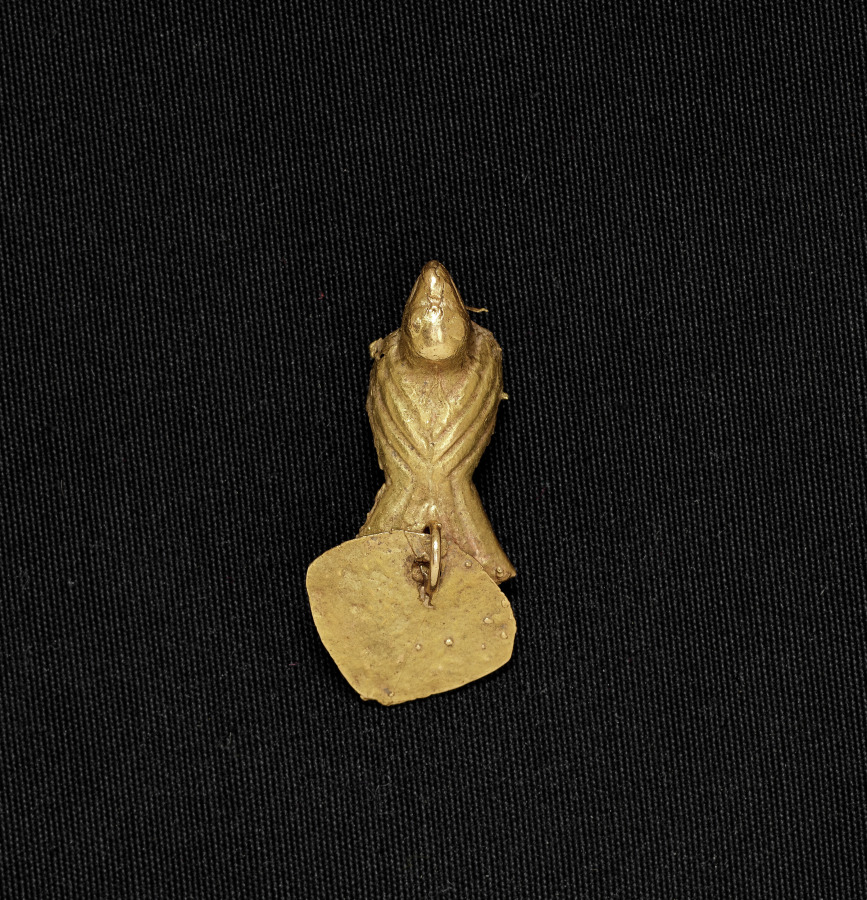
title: Bird Bead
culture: Colombia, Muisca style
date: c. 900–1550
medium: cast gold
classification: Jewelry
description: Muisca metalwork divides into two categories: ornaments to be worn, such as these, and offering figurines, in the case to the right. The elaborate bird pendant features delicate herringbone moldings, openwork patterns, and wing details-all part of the wax model from which the pendant was cast (see nearby computer animation). The dangles were attached after casting.